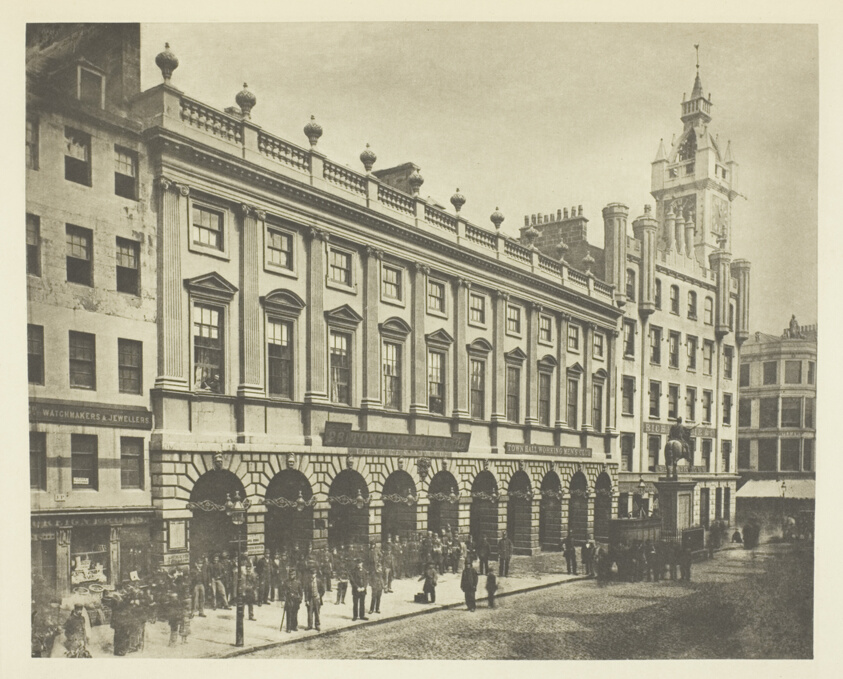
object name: Photograph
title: Tontine Building, Trongate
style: 19th century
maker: Thomas Annan (Scottish, 1829–1887)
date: 1868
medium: Photogravure, plate 19 from the book "The Old Closes & Streets of Glasgow" (1900)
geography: Scotland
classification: photograph; photography